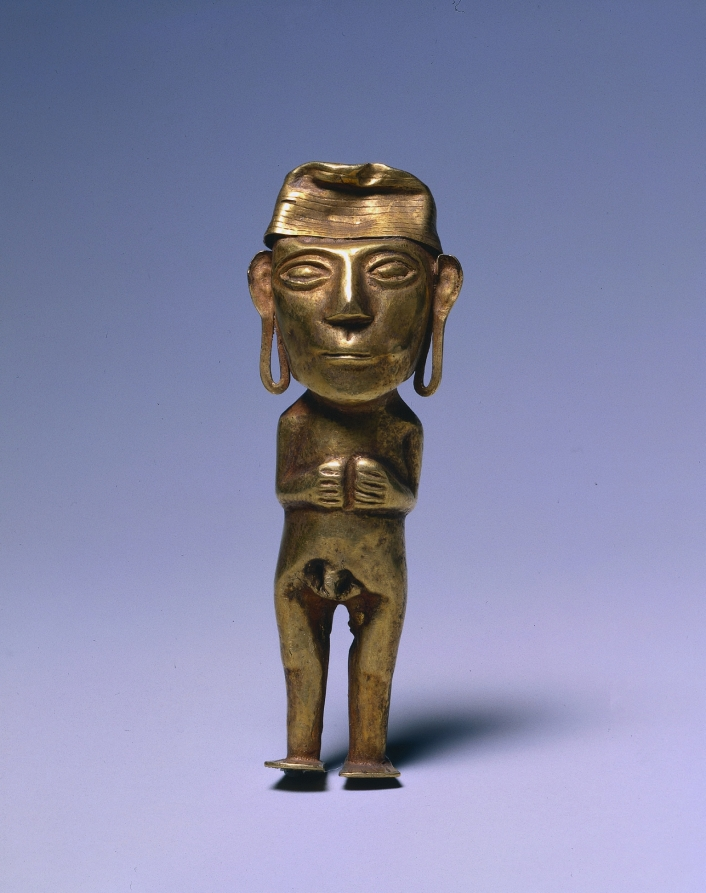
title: Male Figurine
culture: Peru, Lambayeque Valley, Inka style (1400-1532)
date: 1400–1532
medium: hammered gold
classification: Metalwork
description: Precious metal was a major Inka artistic medium, but most was melted down after the conquest to fund the Spanish court. The sole remains are small-scale objects from tombs and offerings. Figurines like this have been found at shrines on sacred mountain peaks, where they accompanied child sacrifices in offerings made during times of crisis, such as famine.